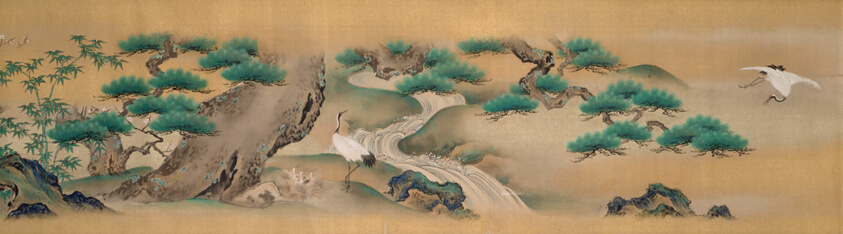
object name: Drawing and Watercolor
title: Mount Hôrai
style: Japanese (culture or style)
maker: Kano Isen'in (Japanese, 1775-1828)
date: About 1802–16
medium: Pair of handscrolls; ink and colors on silk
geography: Japan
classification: hanging scroll; painting; asian art